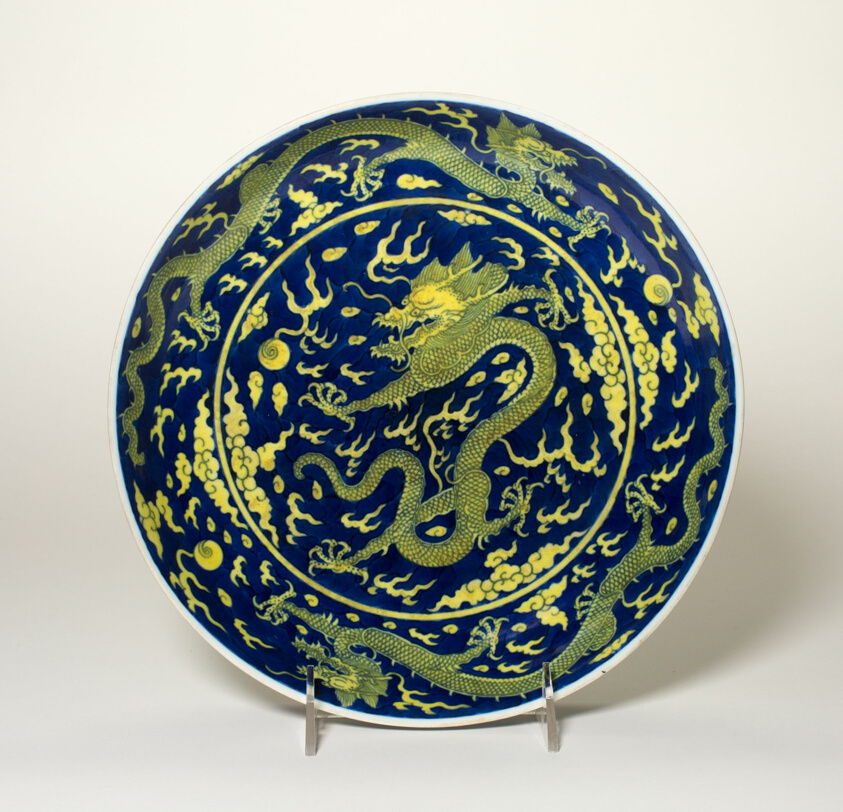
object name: Vessel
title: Blue-Ground Yellow-Enameled 'Dragon' Dish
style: Chinese (culture or style)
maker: China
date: Qing dynasty (1644–1911), Qianlong reign mark and period (1736–1795)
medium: Porcelain with underglaze blue and overglaze yellow enamel decoration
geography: China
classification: dish (vessel); porcelain; asian art; ceramics; vessel